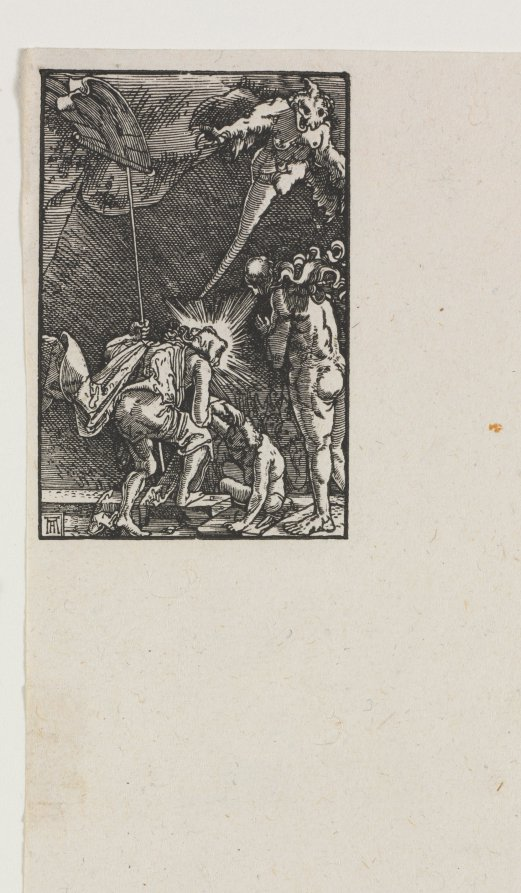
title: The Fall and Redemption of Man: Christ Descending into Hell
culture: Germany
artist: Albrecht Altdorfer (German, c. 1480–1538)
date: c. 1515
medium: woodcut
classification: Print